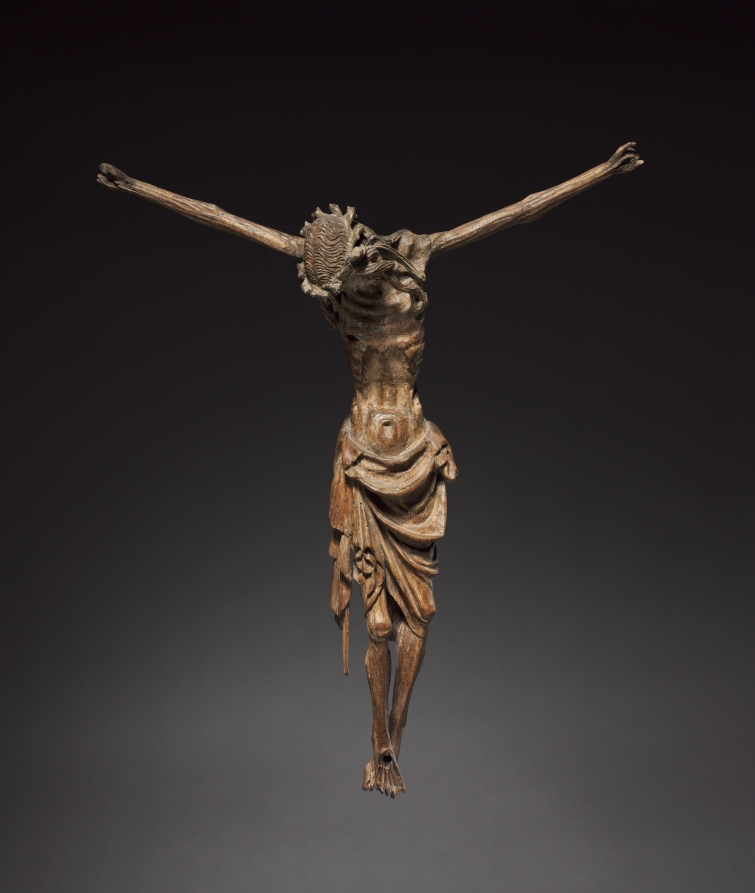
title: Crucified Christ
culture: Germany, Cologne, 14th century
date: c. 1340–1350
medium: wood (walnut) once polychromed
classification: Sculpture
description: The striking impression of this figure is the vivid representation of suffering. The sculpture captures the moment after Christ’s death: the drooping head on a frail neck is a mask of agony. The eyes are nearly shut, the mouth is ajar, and the forehead crowned by heavy, gouging thorns is drawn with pain. The elongation of the body is emphasized by the emaciated chest with protruding ribs and bony limbs. The resulting sense of frailty and pathos is augmented by the heavy strands of hair that uncurl alongside the tormented face and by the loincloth folds that break the downward drape of the body. The sculpture belongs to a group of emotional crucifixes and pietas carved in the Middle-Rhine region for over a century beginning around 1300, examples of which are principally found in the city of Cologne. Such sculptures appealed to the Rhenish mystics, who advocated meditation based on the Passion of Christ.